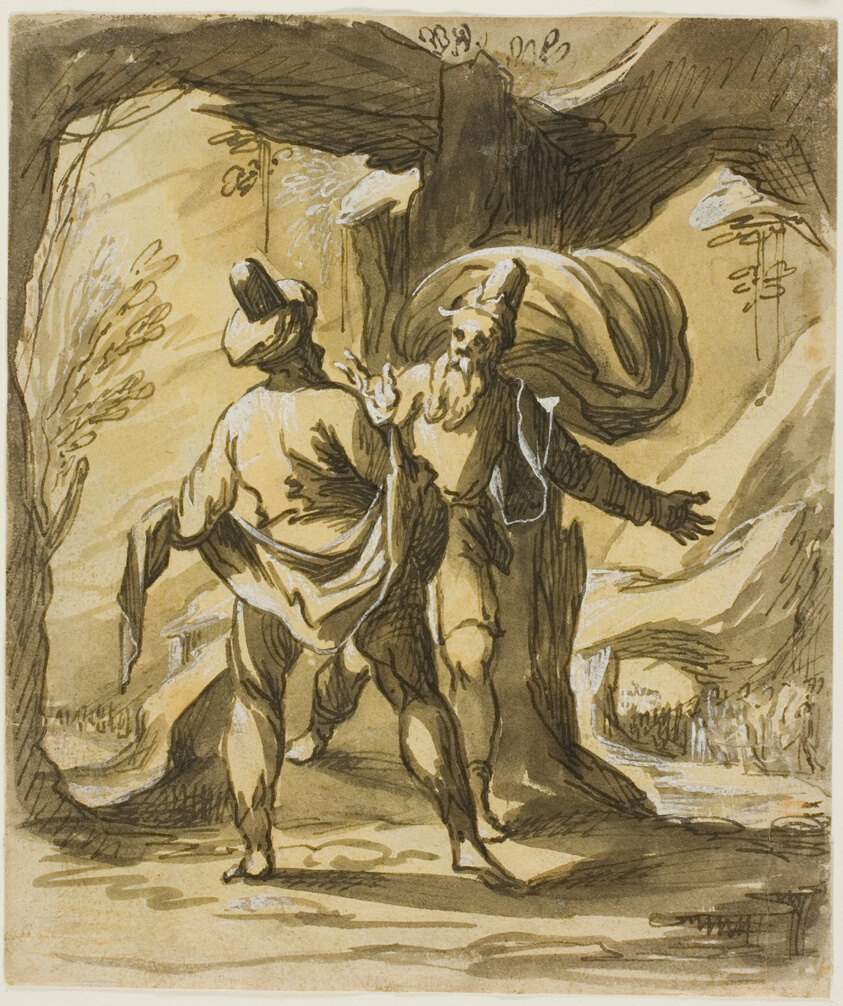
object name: Drawing and Watercolor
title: Adam and Eve Under a Tree (recto); Two Men in Dispute (verso)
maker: Hermann Weyer (German, c. 1596-1621)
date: 1610/20 (recto); 1616/21 (verso)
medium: Pen and black ink, with brush and gray and brown wash, heightened with white gouache, on cream laid paper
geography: Germany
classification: pen and ink drawings; drawings (visual works); prints and drawing